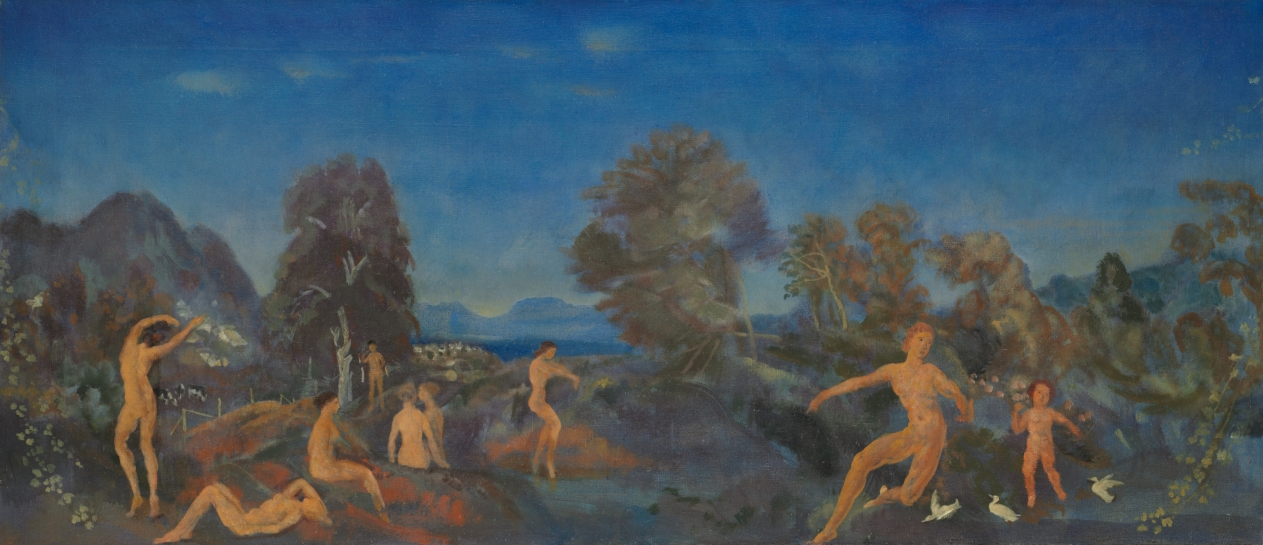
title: Hermes and the Infant Dionysus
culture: America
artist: Arthur B. Davies (American, 1862–1928)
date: 1900–1915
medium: oil on canvas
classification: Painting